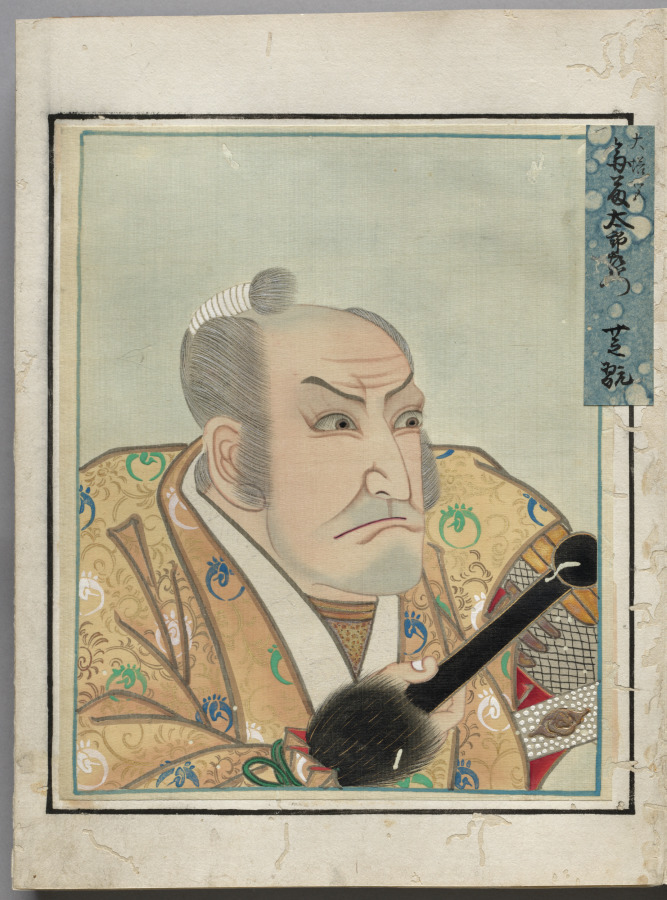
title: Double-Leaf from Album of Actor Portraits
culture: Japan, Edo period (1615–1868)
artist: Shōrakusai (Japanese)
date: c. 1790–1810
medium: double-leaf from an accordion-style album; ink on paper (right) and ink and color on silk (left)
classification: Bound Volume